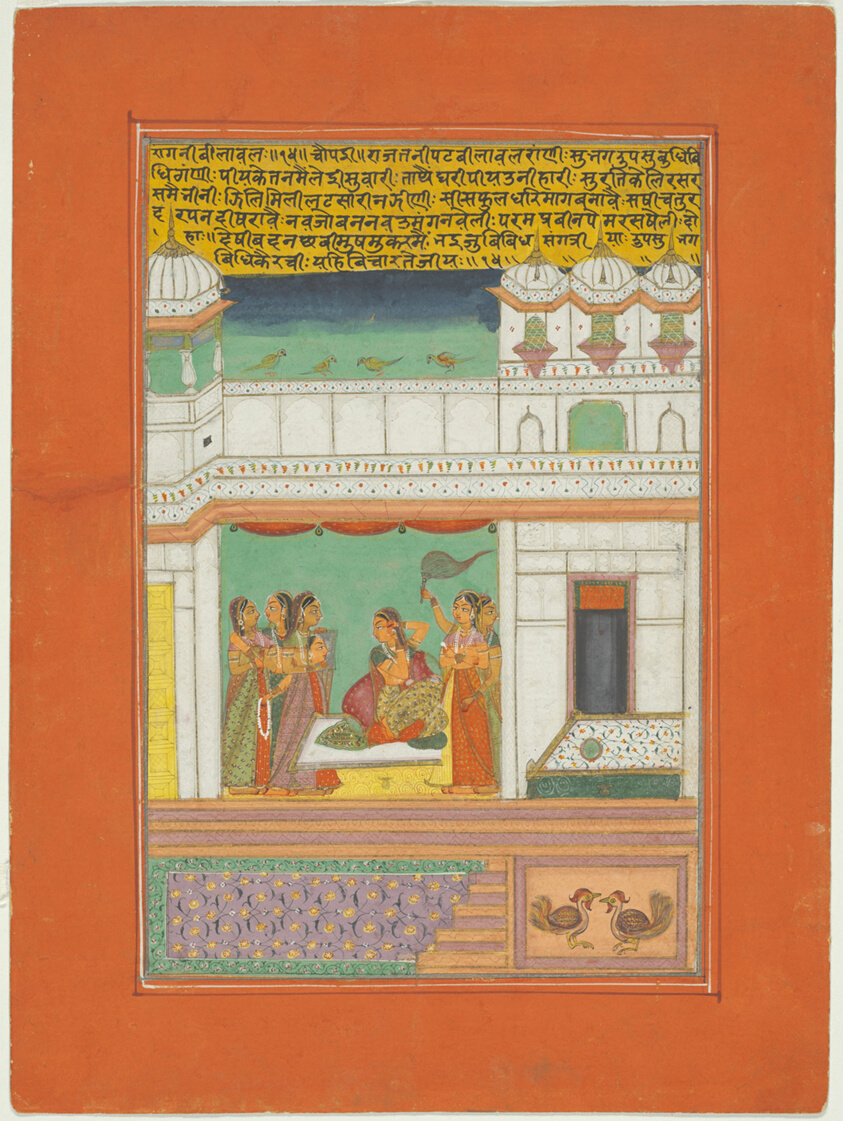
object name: Painting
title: Ragini Bilaval, Page from a Jaipur Ragamala Set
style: South Asian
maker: India; Rajasthan, Jaipur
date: c. 1750-1770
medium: Opaque watercolor on paper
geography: Rajasthan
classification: miniature painting; painting; asian art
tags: music, musicians